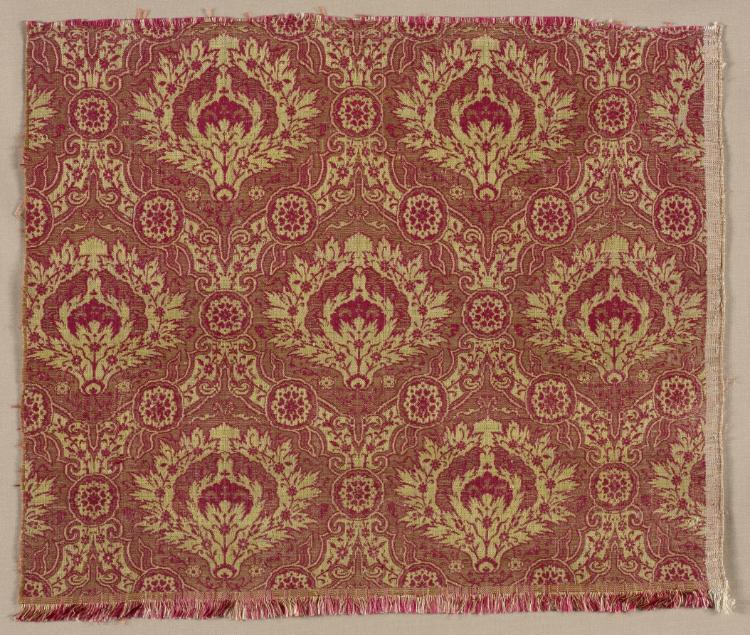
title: Fragment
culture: Iran, Safavid period (1501–1722)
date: 1600s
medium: silk and metal: twill weave with areas of double cloth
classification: Textile